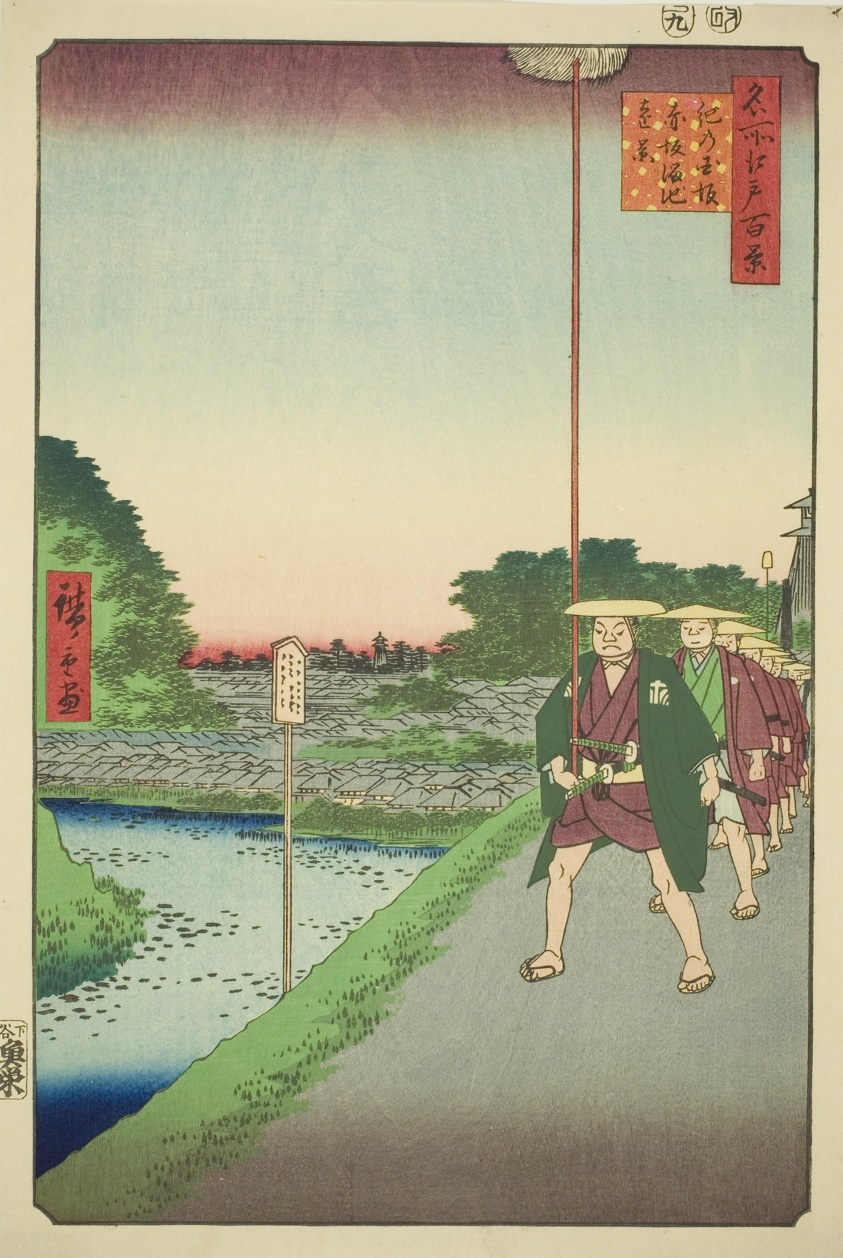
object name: Print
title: Distant View of Akasaka Reservoir from Kinokuni Slope (Kinokunizaka Akasaka Tameike enkei), from the series "One Hundred Famous Views of Edo (Meisho Edo hyakkei)"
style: Japanese (culture or style)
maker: Utagawa Hiroshige 歌川 広重; Japanese, 1797-1858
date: 1857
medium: Color woodblock print; oban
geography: Japan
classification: print; asian art